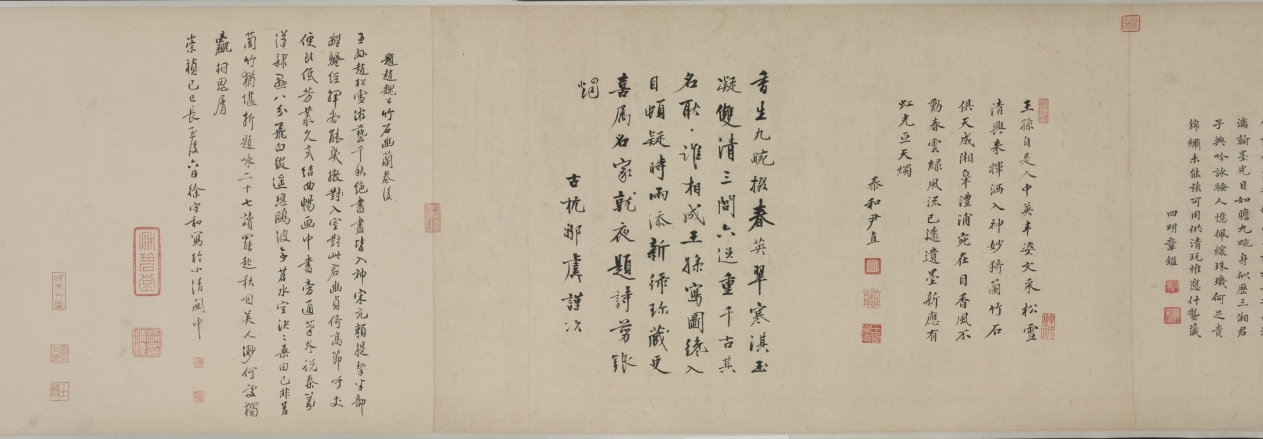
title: Bamboo, Rocks and Lonely Orchids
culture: China, Yuan dynasty (1271-1368)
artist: Zhao Mengfu (Chinese, 1254–1322)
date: 1271–1368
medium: Handscroll; ink on paper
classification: Painting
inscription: 竹石幽蘭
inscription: 孟頫為善夫寫. [印] 趙氏子昂; [印] 松雪齋; [印] 天水郡圖書印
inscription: 古人善書者必能畫點墨作蠅，便自有生意。松雪翁蘭石草聖飛帛筆法皆具，可寶也。安陽韓性 [印]明善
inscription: Colophon 2. Qiu Yuan 仇遠 (1247-after 1328), a respected poet during the Song and Yuan periods. He was linked to, among others, Zhao Mengfu and Gao Kegong. Zhao Mengfu painted a version of Nine Songs 九歌圖 for him, and Gao Kegong dedicated to him a painting titled Mountain Village 山村圖 (current whereabouts unknown). His poem here is also preserved in his collected works.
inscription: Colophon 3. Zheng Yuanyou 鄭元祐 (1292-1364), an erudite scholar and teacher of renown, active in Hangzhou and Suzhou. In the 1350s, when Gu Ying’s literary gatherings were at their peak, he was already elderly and participated in a limited way.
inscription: Colophon 4. Wu Kegong 吳克恭 (active mid-1300s), a friend of Gu Ying and Ni Zan 倪瓚 (1301–1374), a major Yuan painter.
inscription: Colophon 5. Angji 昻吉 (jinshi of 1348), of Western Xia 西夏 origin and a poet of distinction. He wrote an introduction to the painting Literary Gathering at Yushan 玉山雅集圖, of which Zhang Wo was the painter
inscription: Sheet 2. Yuan: friends of Gu Ying Colophon 6. Wang Zifang 王孜方 (active mid-1300s), an official who, at the time of his visits to Gu Ying’s estate, had reached the rank of Minister. He is better known under the name Wang Keju 王可矩.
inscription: Colophon 7. Ke Jiusi 柯九思 (1290–1343), a major official who served in the Kuizhang Pavilion 奎章閣 and as an advisor to Emperor Wenzong in matters of calligraphy and painting.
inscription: Colophon 8. Yu Li 于立 (active mid-1300s), a Daoist recluse, poet, and close friend of Gu Ying, so much so that during his visit to Gu Ying’s estate he was given accommodation in a special pavilion. His poem here is also preserved in Gu Ying’s Cao tang ya ji.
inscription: 至正十一年十月廿八日男奕百拜堇觀 [印] 趙奕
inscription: Colophon 10. Yu Ji 虞集 (1272-1398), a major official and literary figure who also served in the Kuizhang Ge. His poem is recorded in his collected works. The poem is one of a set of four inscribed at the request of Wang Huayu 汪華玉 on Orchids and Rock 蘭石圖 by Zhao Mengfu, obviously a different, long lost, painting. Wang Huayu was an official and a collector (jinshi of 1327). Yu Ji’s colophon here was written before 1348 and during his retirement in Linchuan 臨川, Jiangxi, possibly sent from there. It is possible he had not seen the painting, and his calligraphy here appears to be rather casual and detached, jotting down an old poem without much care, contrary to his earlier practice.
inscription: Colophon 11. Sun Shi 孫時 (mid-1300s–early 1400s), a native of Yuncheng 鄆城, Shandong, and a jinshi of 1390. He may have been quite young when paying a visit to the Yushan gatherings in the late 1340s and early 1350s.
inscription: Colophon 12. Zhang Zhu 張翥 (1287–1368), Qiu Yuan’s disciple and a poet of renown, who enjoyed a belated career in officialdom and was known for his integrity.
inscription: Sheet 4. Yuan and Ming: further friends of Gu Ying; colophon 17 begins the early Ming sequence. Colophon 13. Zhang Wo 張渥 (active c. 1336-after 1364), a frustrated scholar, a poet, and a painter of landscape and figures. An active participant in Gu Ying’s literary circle, he painted the Literary Gathering at Yushan, a pictorial document of the individuals and activities on Gu Ying’s estate. His rendering of Nine Songs is well known, and one version is in the collection of the Cleveland Museum of Art (see 1959.138). His poem here is also found in Gu Ying’s Cao tang ya ji, under the entry “ti Zhao Hanlin mo lan 題趙翰林墨蘭” (inscribed on the Ink Orchid by Zhao the Hanlin academician). This is a rare instance of calligraphy as well as signature by the artist.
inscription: 觀吳興公竹石幽蘭圖使人鄙吝頓消。其筆勢從橫天真爛澷，一出於二王書法。冝仲瑛寳而玩之異於常品也。至正八年十月天台陳基書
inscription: Colophon 15. Zhang Shen 張紳 (active about 1340–after 1385), a respected calligrapher and participant in Gu Ying’s literary gathering. He resided in Kunshan, the same city where Gu Ying’s estate lies. In the third line of the poem, he mentioned Gu Ying’s hao, “Jinsu 金粟.” This was a name he assumed later in life, after the death of his mother in the year 1356. Thus this inscription must have been written after that date.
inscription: Colophon 16. Wang Sun 汪遜 (active mid-14th century), a little-known native of Kuaiji 會稽, who may have been one of the infrequent visitors to Gu Ying’s estate.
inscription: Colophon 17. Hu Guang 胡廣 (1370-1418) is the first Ming colophon writer on this scroll. He was an official of great power in the court and a trusted advisor of Emperor Chengzu; he served as the Grand Academician of the Hall of Literary Profundity 文淵閣大學士 and Grand Academician of the Left Secretariat of the Heir-Apparent 左春坊大學士.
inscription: Sheet 5. Early Ming Colophon 18. Wang Yinshi 王尹實 (active about 1403–about 1424), a native of Siming 四明, Zhejiang, and a minor official and calligrapher.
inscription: Colophon 19. Zhang Yuchu (signed here as “Wuwei 無 為”), the forty-third Heavenly Master of the Zhengyi sect of Daoism. A man of erudition, he was also a poet, painter, and calligrapher. A modified version of the poem here was published in his collected works titled Xian quan ji 峴泉集. A slight modification in the first line is the only change: “Wu xing miao yao nian bing xue zi 吳興玅年氷雪姿.”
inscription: Colophon 20. Yao Guangxiao 姚廣孝 (1335-1418), a Buddhist monk, scholar, and counselor to Chengzu in his successful attempt at usurpation of the throne. Yao Guangxiao was a controversial figure but wielded enormous power.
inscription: Sheet 6. Wang Ning alone Colophon 21. Wang Ning 王寧 (d. 1411) signed as “Qingzhen 清真” in this colophon. One of the three seals reveals his identity as the Yongchun Hou 永春侯 [Marquis of Lasting Spring] (appointed 1402), and the husband of Princess Huaiqing 懷慶公主 (1328-1398), the sixth daughter of the founder of the Ming dynasty, Zhu Yuanzhang. This colophon postdates 1402.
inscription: Sheet 7. Mid-Ming Colophon 22. Ou Yi’an 區易安 (active first half of 15th century), unknown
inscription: Colophon 23. Chen Lian 陳璉 (1370-1454), a native of Dongguan 東莞, Guangdong 廣東, and an official admired for his erudition and perspicacity. In view to the known calligraphic style of Chen Lian, this colophon appears to be a transcription and not written by him.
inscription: Colophon 24. Wei Ji 魏驥 (1374-1471) enjoyed longevity (he lived to the age of ninety-eight) and an extended length of service as an official. A jinshi of 1406, he eventually became the Minister of Personnel in Nanjing 南京吏部尚書. The colophon here is dated 1434, when he was invited to view the painting by the Court Musician Mo Zhizhong 莫至翀, its owner. Again, in view of its calligraphic style, this was not written by him, but is a transcription from the original.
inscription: Colophon 25: Zhang Yi 章鎰 (active 1462-1473), a Ningbo native and an official with a reputation for courage and integrity.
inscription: Sheet 8. Further mid-Ming Colophon 26. Yin Zhi 尹直 (1427-1511), a controversial figure in Ming politics in spite of his erudition and high position as the Minister of War 兵部尚書.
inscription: Colophon 27. Zou Yu 鄒虞 (active 1460-1520; jinshi of 1490), a native of Hangzhou. In 1510, he was appointed Administrative Vice Commissioner in Guangdong.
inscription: Sheet 9. Xu Shouhe 徐守和 alone Colophon 28. Xu Shouhe 徐守和 dated his entry in 1629. Since he wrote it in his own studio, The Lesser Qingbi Pavilion 小清閟, he was likely the owner of the scroll. Xu’s life is not well documented; he was a connoisseur of note during the last years of the Ming dynasty rule. He may have acquired the Cleveland scroll from Wu Ting, whose seals appear here.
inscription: Sheet 10. The mounter’s note. Xu Shudong 徐曙東 of Jiaxing 嘉興 made the remounting on the first day of sixth month, 1802.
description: Bamboo and orchids are motifs associated with the virtues of the scholar-official. Bamboo that bends but does not break stands for moral integrity, endurance, and loyalty. Wild, fragrant orchids that bloom in the shadow symbolize modesty and the aura of learnedness. Rocks are often considered to be miniature versions of mountains that form the universe. This monochrome ink painting is brushed on paper in a masterfully calligraphic manner. While the rocks are delineated in chalky, dry strokes showing the effect of flying white (feibai), the bamboo and orchids are drawn with a swift brush demonstrating the virtuosity of the artist.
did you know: One of the many inscriptions records that the handscroll was last remounted by Xu Shudong 徐曙東 of Jiaxing 嘉興 in 1802.